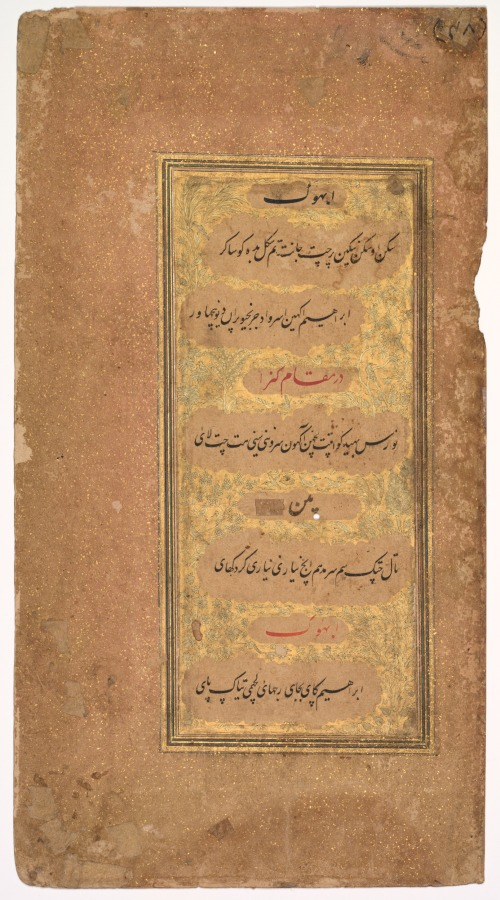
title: From Dohras (Songs) 40 and 42 from the Kitab-i Nauras (Book of Nine Essences) of Sultan Ibrahim Adil Shah II of Bijapur (r. 1580–1627) (recto)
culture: India, Bijapur, Deccan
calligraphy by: Khalilullah Butshikan (Persian, active in India 1596–c. 1620)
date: 1618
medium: ink with two-tone gold on paper, double-sided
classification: Painting